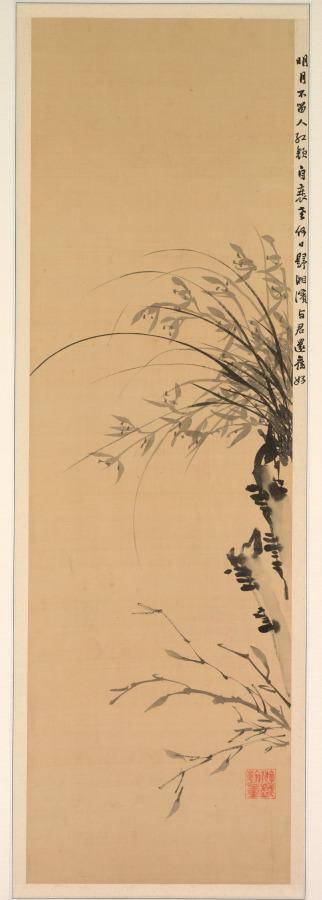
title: Orchids and Rocks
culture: Korea, Joseon dynasty (1392–1910)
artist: Yi Ha-eung (Korean, 1820–1898)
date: 1897–98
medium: Eight-panel folding screen; ink on silk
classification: Painting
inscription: Translation: [I] painted for the high minister Yangwon. [I] humbly request your corrections and advice [on my painting]. [By] an eighty-year old gentleman of rocks.)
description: Yi Ha-eung (1820−1898), the artist of this eight-panel folding screen, was one of the most influential men in late 19th-century Korea. Acting as the regent for his son, King Gojong (1852−1919), who ascended the throne at the age of thirteen, Yi ruled Korea from 1866 to 1873. In addition to his illustrious political career, Yi was also recognized as one of the most celebrated artists who led the revival of literati art in late 19th-century Korean art. In particular, he was recognized as the master of orchids, one of the “Four Gentlemen” (plum, orchid, chrysanthemum, and bamboo) themes. Solely relying on monochrome ink, Yi depicted the curvilinear silhouettes of cymbidium orchid leaves dramatically hanging down from cliffs. Growing in wilderness and redolent with fragrance, orchids were often associated with the perseverance of principled gentlemen, and thus became one of the most popular subjects of scholar-artists' paintings.On the upper right corner of the far left panel, Yi wrote a short inscription stating that he painted the work at the age of 80.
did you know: The artist of this elegant painting is the formidable politician Yi Ha-eung (1820–1898), who is known for a seclusion policy that aimed to protect Korea and its sovereignty from foreign influences.